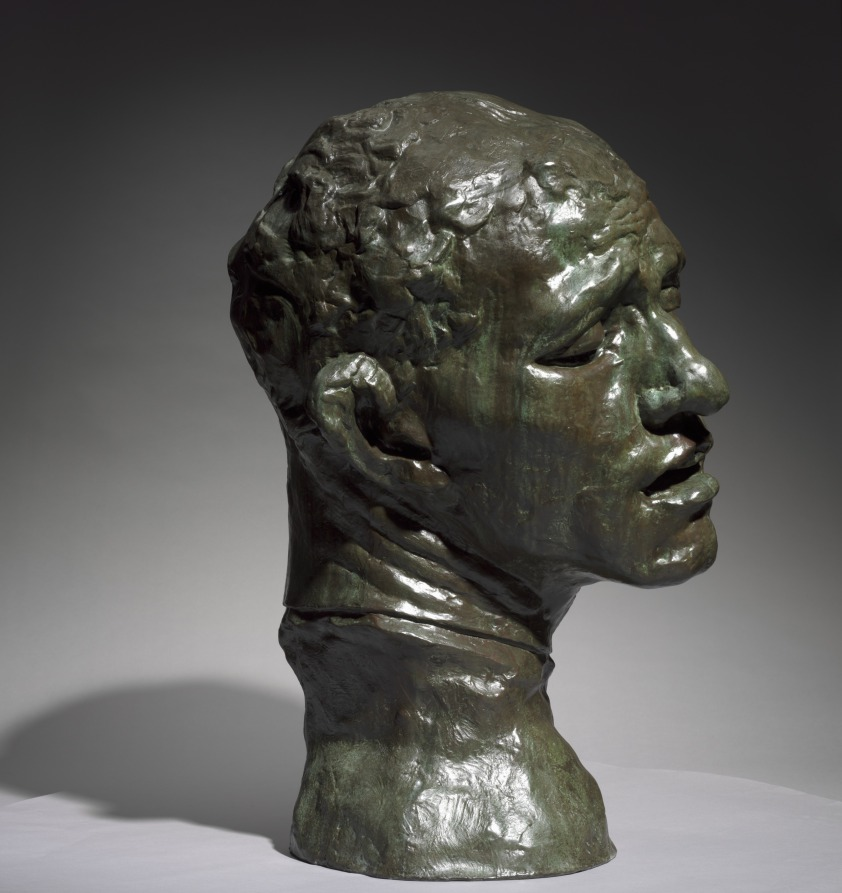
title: Heroic Head of Pierre de Wissant, One of the Burghers of Calais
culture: France, 19th century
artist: Auguste Rodin (French, 1840–1917)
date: 1886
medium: bronze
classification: Sculpture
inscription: inscribed at neck, left: A.Rodin; inscribed lower back: Alexis Rudier/Fondeur-Paris.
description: This sculpture depicts one of the figures in Rodin’s large public monument The Burghers of Calais (1884–89), featuring six French men who volunteered to be taken prisoner by the English in exchange for lifting the siege of Calais during the Hundred Years War (1337–1453). Pierre de Wissant’s anguished expression suggests extreme mental suffering as he contemplates his expected execution. Rodin exhibited a life-size version of the figure as an independent work before completing the monument. He later made multiple versions in various sizes and media.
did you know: This sculpture depicts the head of a figure from Rodin's large public monument The Burghers of Calais (1884-89). The CMA also owns a plaster version of the head.